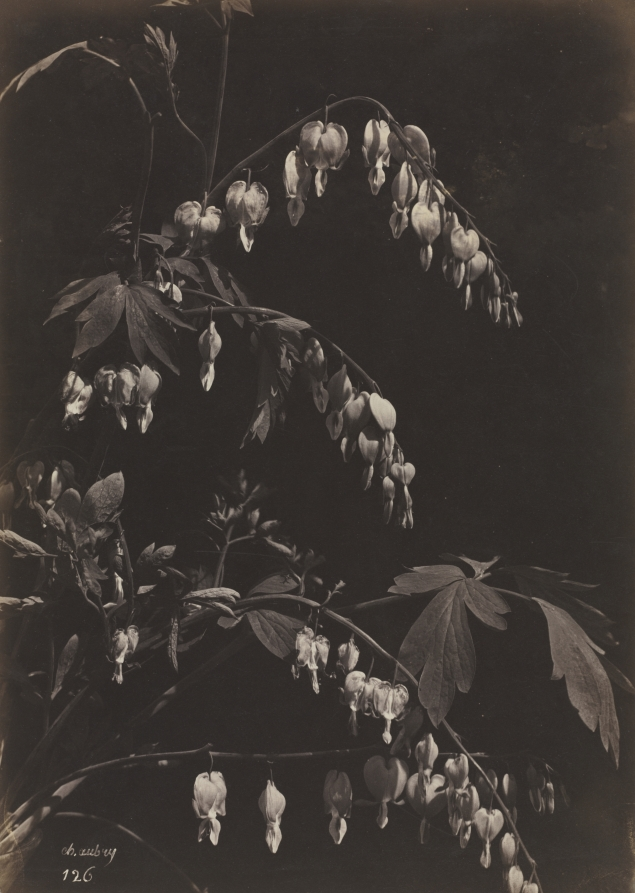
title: Floral Still Life (Bleeding Hearts)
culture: France, 19th century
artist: Charles Aubry (French, 1811–1877)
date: c. 1865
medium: albumen print from glass negative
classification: Photograph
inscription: Written in negative: "ch.aubry/126"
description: Noted for his close-up studies of leaves, blossoms, and foliage, Charles Aubry was a photographer whose work encompassed both the documentary and the artistic. In this image, the artist isloated a plant on a dark background to concentrate attention on the rhythmic patterns of the blossoms and the abstract shapes suggested by the intertwining branches. Aubry's photographs were prized as important visual records by both scholars and artists.